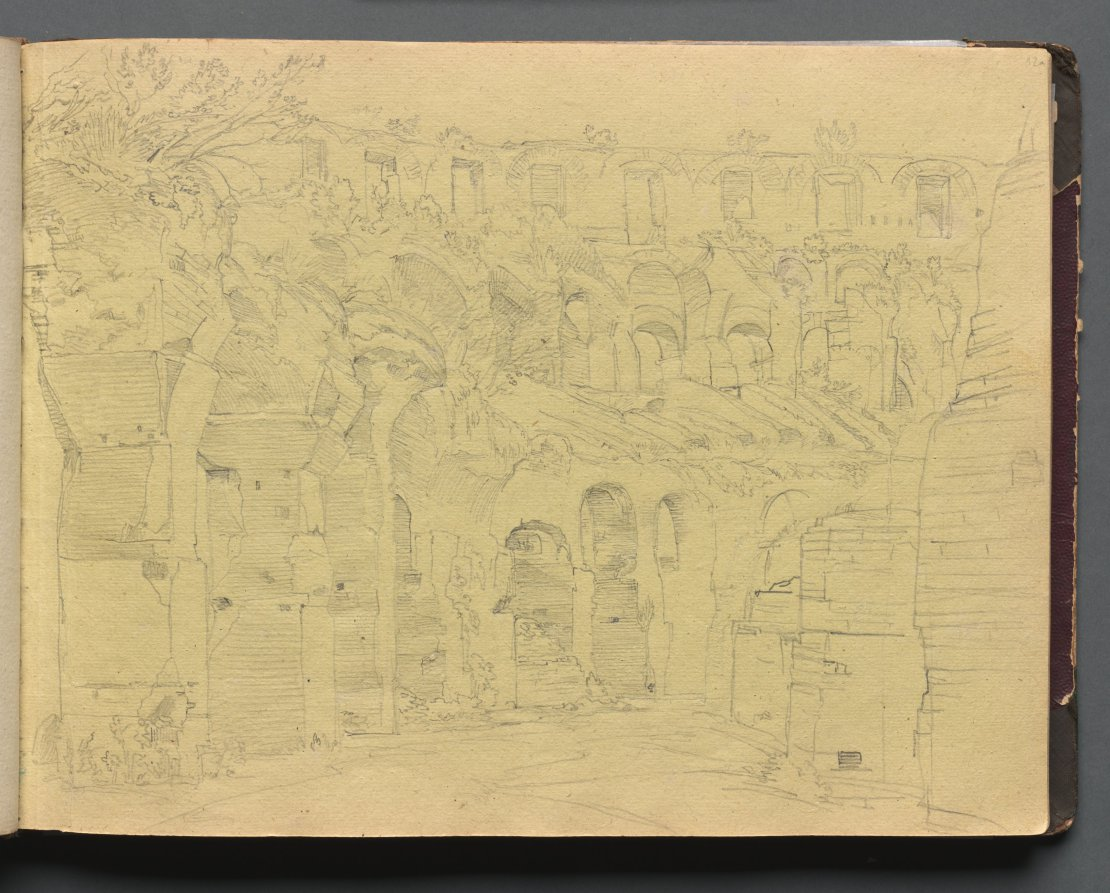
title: Album with Views of Rome and Surroundings, Landscape Studies, page 12a: Roman ruins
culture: Germany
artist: Franz Johann Heinrich Nadorp (German, 1794–1876)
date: c. 1830s-70s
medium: graphite on yellow paper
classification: Bound Volume